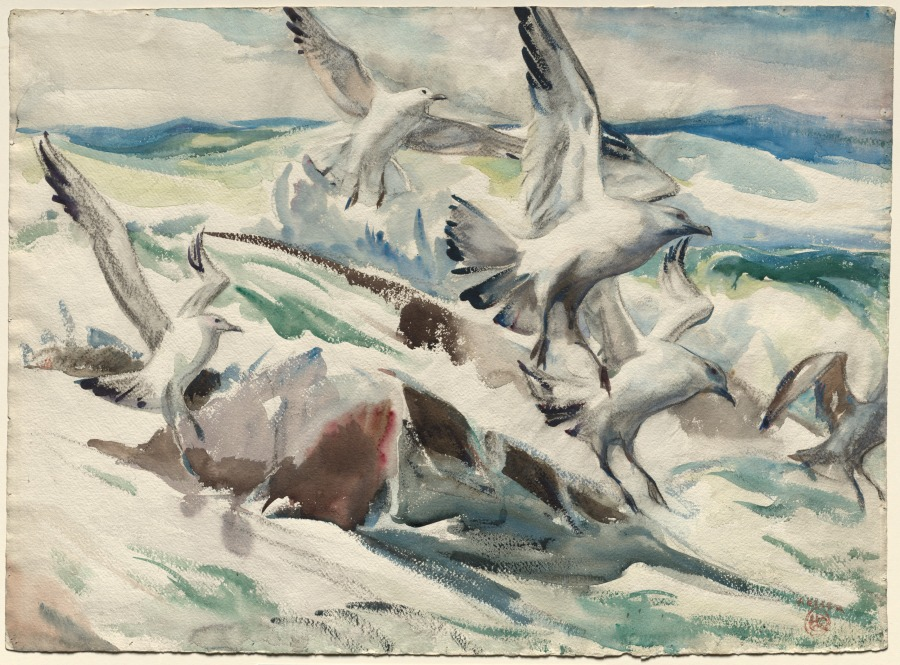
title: Gulls Feeding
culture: America, Ohio, Cleveland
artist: Henry Keller (American, born Germany, 1869–1949)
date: 1927–1928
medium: watercolor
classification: Drawing